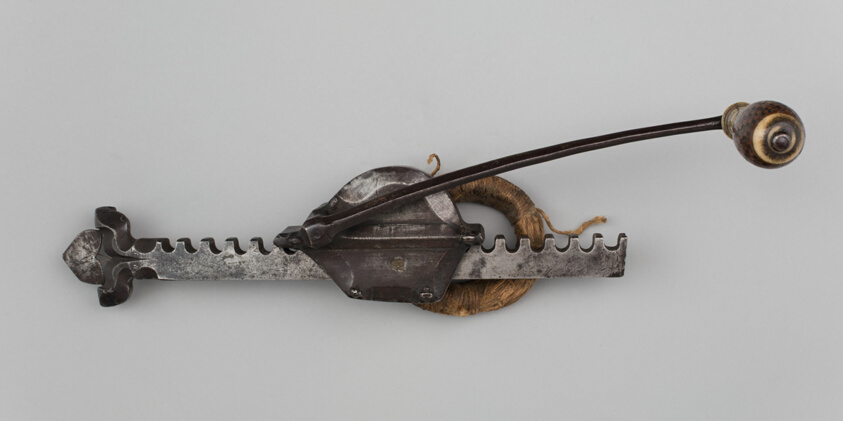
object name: Arms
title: Cranequin (Winder) for a Sporting Crossbow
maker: German, possibly Swiss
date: 1550/1600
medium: Iron, wood, ivory, and cord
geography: Germany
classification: crossbow; arms; arms and armor